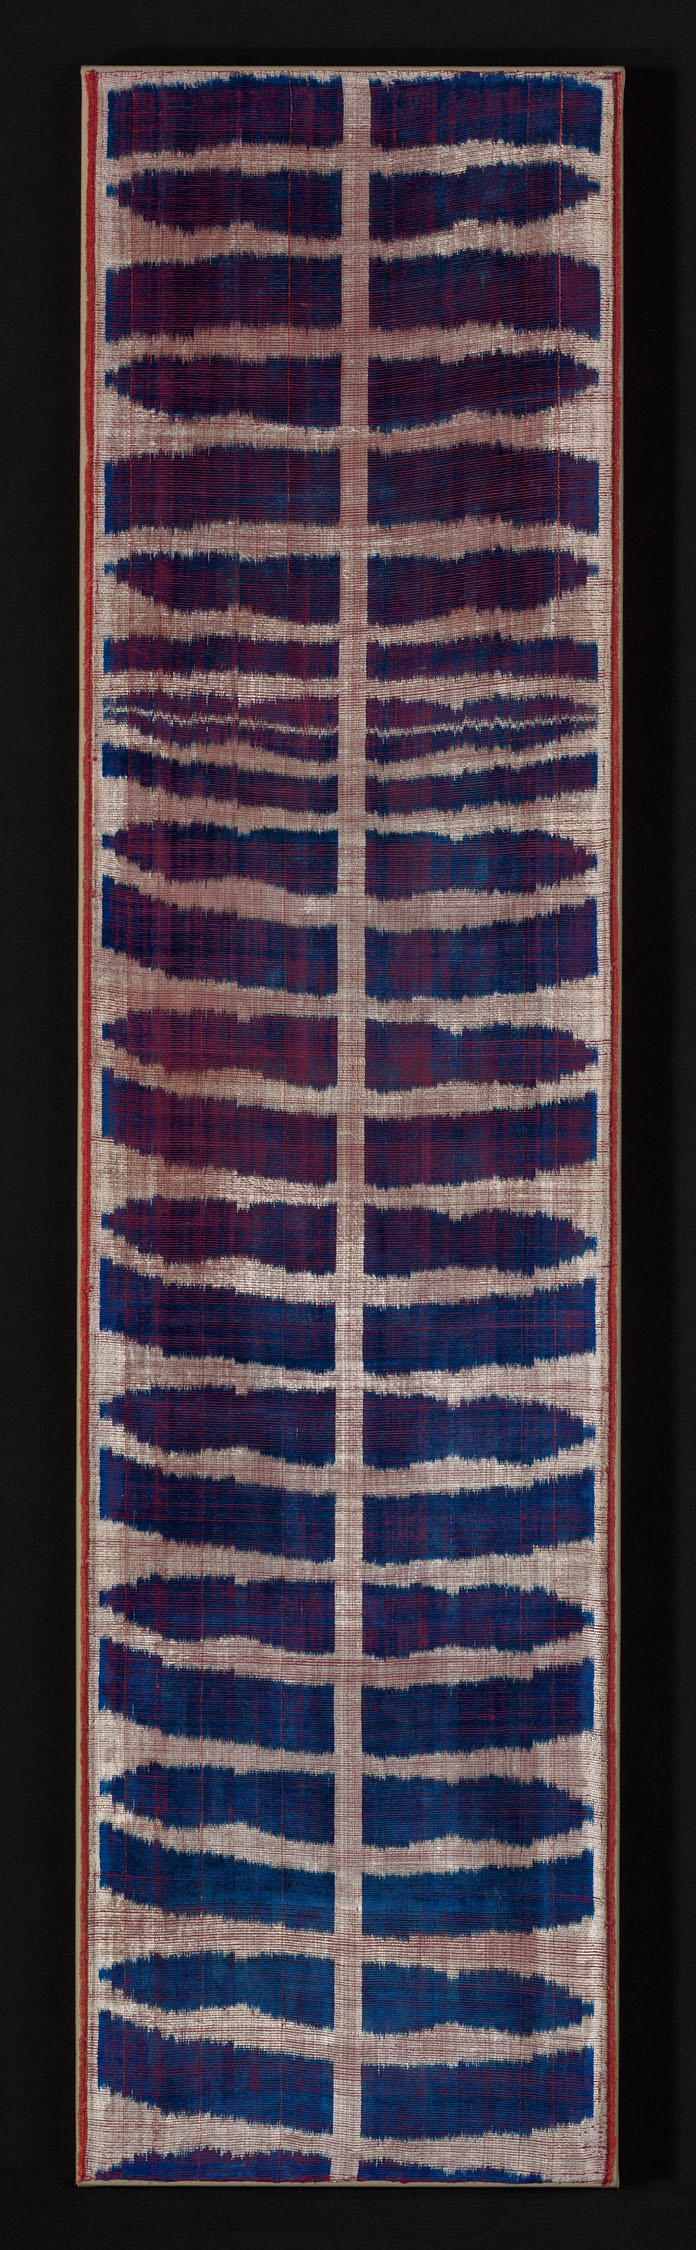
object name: Textile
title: Length of Velvet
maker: Bukhara, Uzbekistan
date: 1875/1900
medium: Silk, twill weave with supplementary warp forming cut velvet; pile warp-dyed (ikat)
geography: Uzbekistan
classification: textile; weaving - velvet